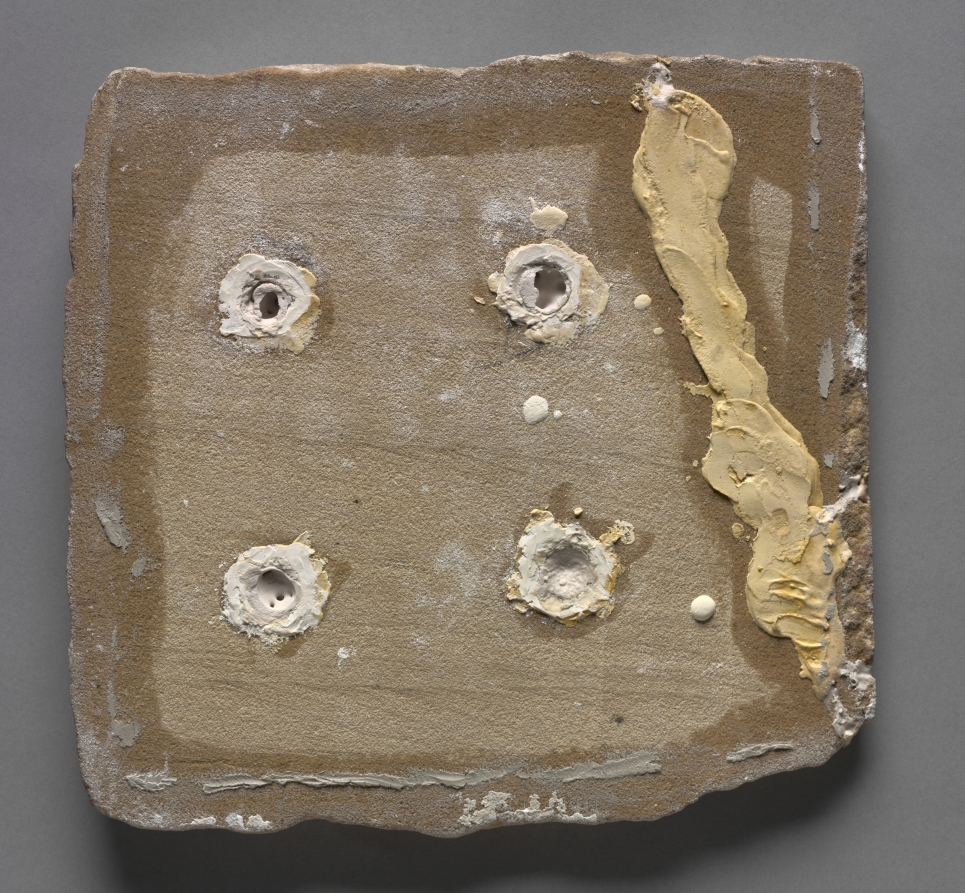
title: Talatat: Portrait of Nefertiti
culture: Egypt, Karnak, New Kingdom (1540–1069 BCE), Dynasty 18, reign of Akhenaten (1351–1334 BCE)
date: c. 1353–1347 BCE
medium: painted sandstone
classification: Sculpture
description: The son of Amenhotep III, Akenhaten, brought about the short-lived "monotheistic" revolution in Egyptian religion near the end of Dynasty 18. The young king constructed a temple complex to the Aten, the Sun Disk, at Karnak—from which this relief comes—before he moved his capital to El Amarna. For reasons yet unknown, the figure of the Queen Nefertiti appears in these reliefs far more often that that of the king. Ironically, the Aten temples were dismantled to be used as foundations and fill for additions to the Great Temple of Amun, whom the Aten had briefly displaced.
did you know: This relief comes from the short end of a talatat, a limestone block of standardized size used during the 18th Dynasty reign of the Pharaoh Akhenaten in the building of the Aton temples at Karnak and Akhetaten. The standardized size and their small weight made construction more efficient.